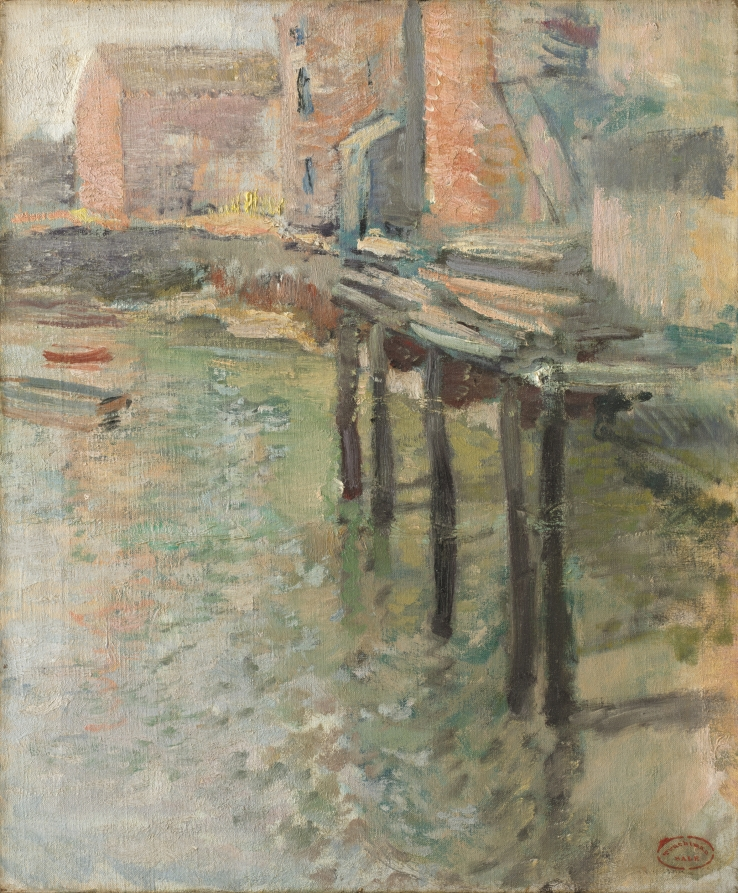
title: Deserted Wharf (The Old Mill at Cos Cob)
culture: America, late 19th Century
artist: John Henry Twachtman (American, 1853–1902)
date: before 1899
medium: oil on canvas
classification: Painting